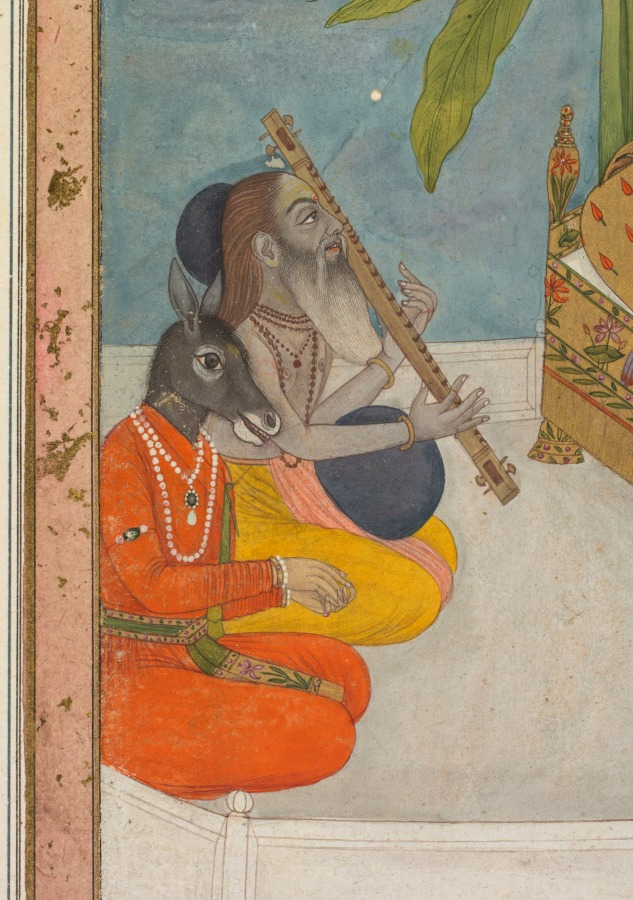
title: Shri Raga: An Illustration from a Ragamala Series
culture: India, Mughal, 18th century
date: c. 1740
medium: Gum tempera and gold on paper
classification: Painting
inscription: Inscription at top, Persian numerals: 31; Persian inscriptions on verso, in nasta‘liq script: 31 Sixth, Shri Raga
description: The verse associated with Shri Raga corresponds closely with this scene: His body, bluish in hue, is marvelously built. He is always graced with the company of auspicious Shri Lakshmi. He sits on a throne of gold, and before him Narada sits playing on his vina. He has decorated himself with garlands of flowers, and also with ornaments set with jewels. Shri raga is thus conceived in sentiment, of whom all learned men sing praises. The horse-headed figure claps his hands and accompanies the sage, wearing saffron garments and playing on the stringed instrument called a vina. He may be derived from the courtly commander of Indra, seen in the Jain manuscripts. Poppies bloom in the formal garden below the pure white terrace, and they are echoed by the oranges set on the windows of the house at the upper right.